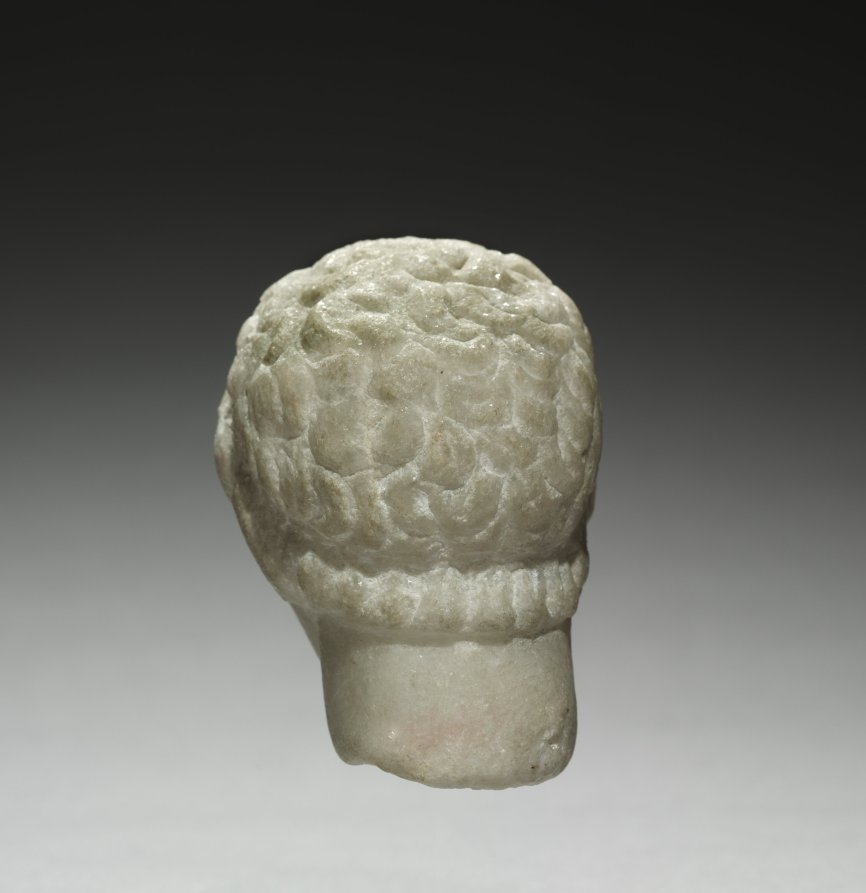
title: Head of a Man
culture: Greece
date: 200s BCE?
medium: marble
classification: Sculpture